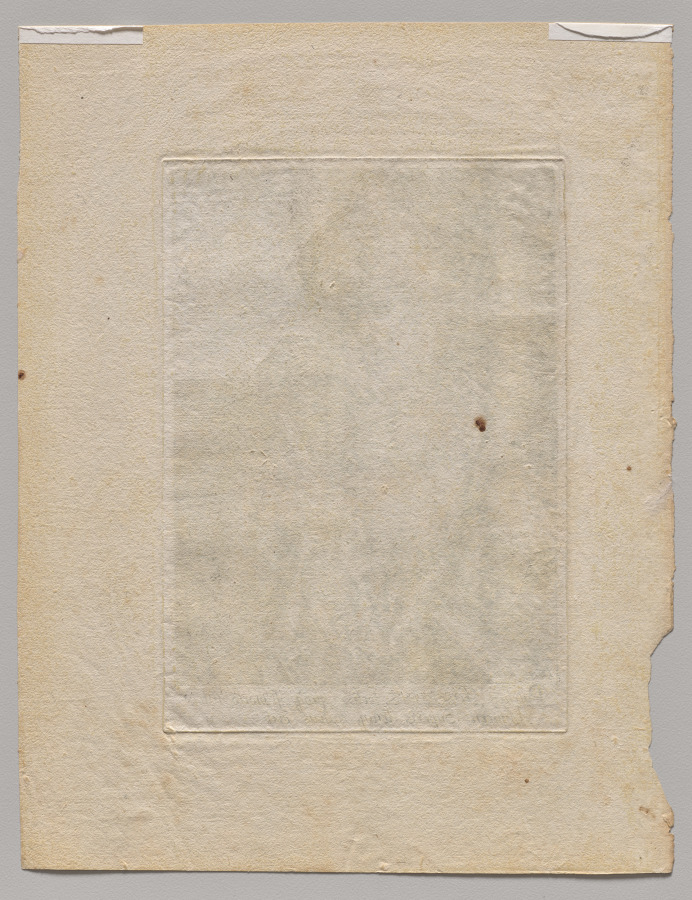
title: Plate 11: Joseph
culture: Netherlands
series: The Twelve Sons of Jacob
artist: Jacob de Gheyn II (Netherlandish, 1565–1629)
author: after Karel I van Mander (Netherlandish, 1548–1606)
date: c. 1589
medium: engraving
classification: Print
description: In this print, the biblical figure Joseph holds a bow next to a quiver of arrows, symbolizing God’s deliverance and protection of Joseph and his people. This is one of a series of prints depicting the twelve sons of Jacob, each with an attribute and costume that denotes his character. According to the Old Testament, Jacob blessed each of his twelve sons, prophesizing the destiny of their tribe, and assigning them a parcel of land in Canaan. The print series was made in the Netherlands in the late 16th century, a time of political struggle when Old Testament heroes were popular exemplars of fortitude and patience.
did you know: The abundantly flowing fountain in this image may refer to Jacob’s blessing to his son Joseph that he would enjoy a double portion of inheritance.